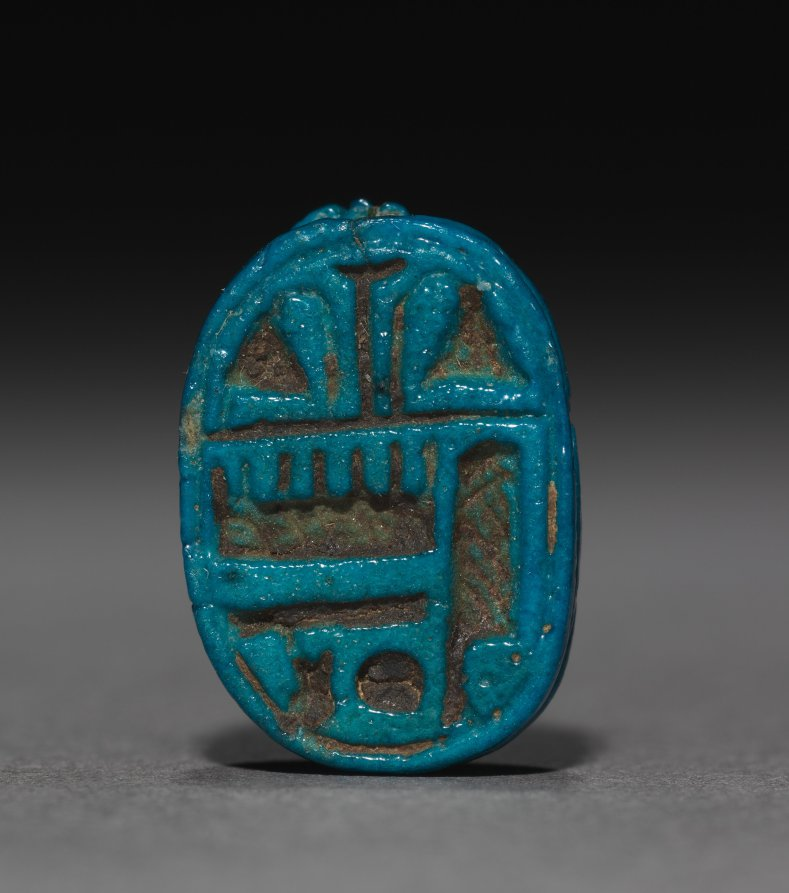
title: Amen-Ra Scarab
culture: Egypt, New Kingdom (1540–1069 BCE), Dynasties 18–19 or later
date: 1540–1186 BCE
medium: blue-glazed faience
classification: Scarabs